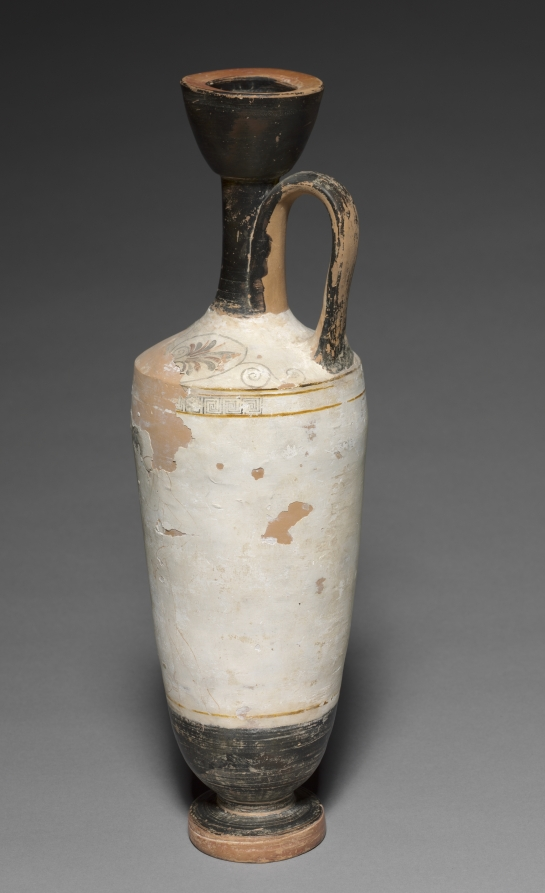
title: White-Ground Lekythos (Oil Vessel): Mourners at Tomb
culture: Greek, Attic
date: c. 400s BCE, with modern painting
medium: ceramic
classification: Ceramic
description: In its basic shape and decorative scheme—three figures before a stepped tomb marker—this lekythos resembles hundreds of funerary vessels made in Athens during the fifth century (400s) BC. But unusual features of the painted decoration, including the multicolored palmettes on the shoulder, and the shoes worn by the youth, suggest a modern intervention. Zinc found in analysis of the white ground is also likely modern, although the vessel itself may be ancient.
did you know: Both stylistic and technical studies suggest that this vase is not wholly ancient.